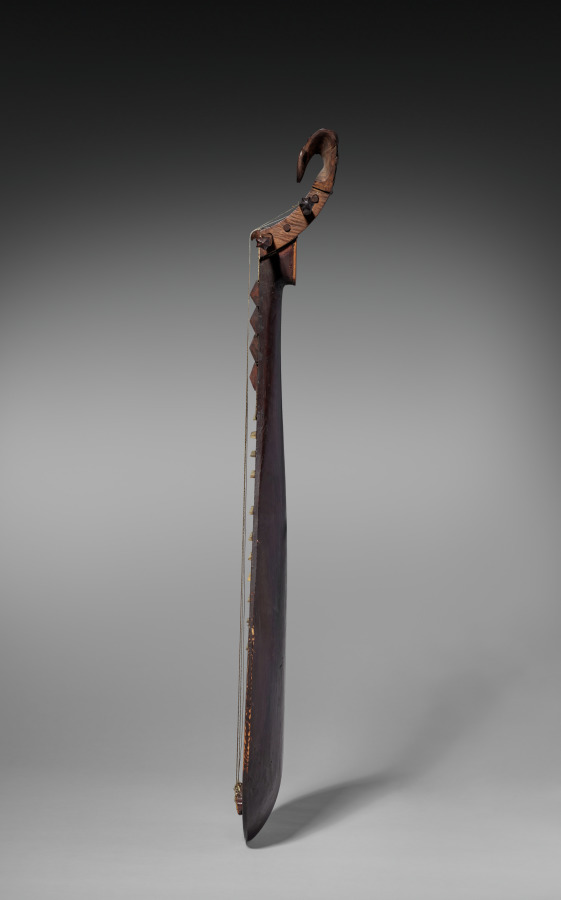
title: Pipa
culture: China, Qing dynasty (1644-1911)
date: 1800s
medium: Wood, ivory, bone, gut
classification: Musical Instrument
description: The term pipa, known since the 3rd century BC, describes the playing motion of the right hand: pi, “to play forward” (left), and pa, “to play backward” (right). A type of lute played with the fingers, it is used in opera and storytelling ensembles and has an impressive, virtuosic solo repertoire. Historic imagery, such as wall paintings, documents the spread of the pipa, along the Silk Road from western and central Asia to China. The bat finial here is a commonly used device on 19th-century Chinese lutes symbolizing good luck.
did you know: The string holder is made of bone.